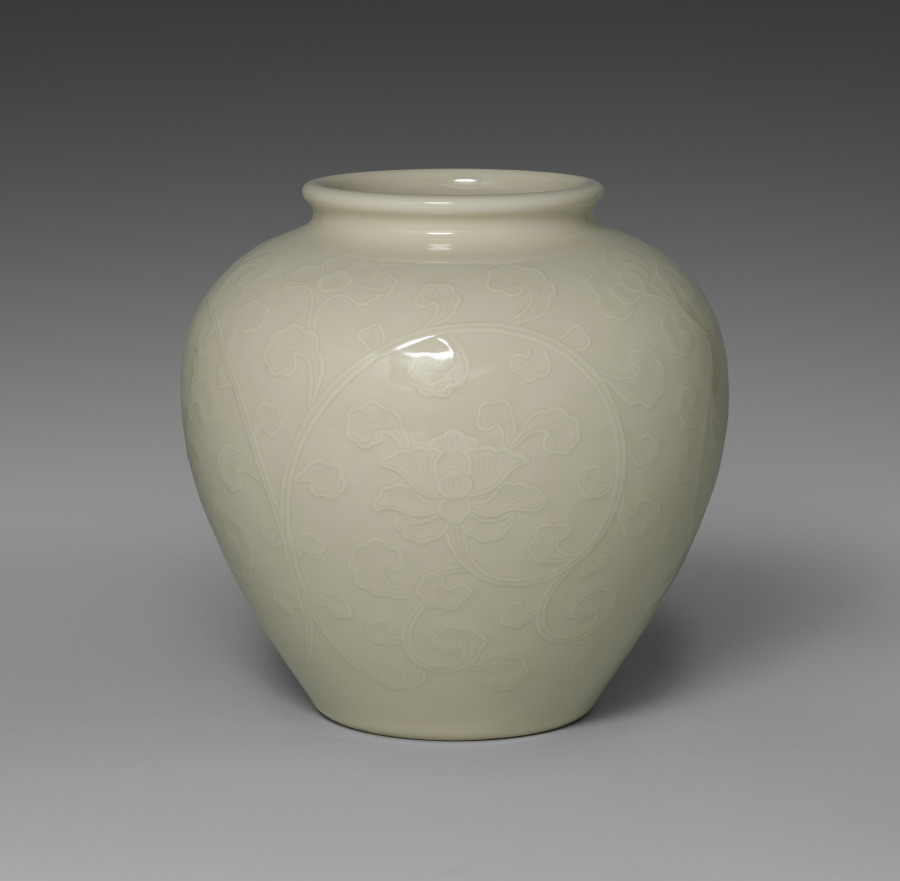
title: Guan-Shaped Vessel with Floral Scroll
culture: Japan, Taishō period (1912–26) or Shōwa period (1926–89)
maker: Seifū Yohei IV (Japanese, 1872–1951)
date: 1914–46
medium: Porcelain with molded and carved design and cream glaze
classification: Ceramic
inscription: 清風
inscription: 清風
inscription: 清風造之 【印】成山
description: Many of the vases created by Yohei III and IV were made with reference to and in emulation of Chinese ceramics in both form and glazing. The Seifu studio was inspired by later Chinese copies of two other archaic vessel types, the hu (Japanese ko) and guan (Japanese kan). In simple terms, in their original contexts, the hu and guan were storage jars that also appeared in ritual contexts. This hefty guan-shaped vase by Yohei IV has a floral scrolling pattern known in Japanese as karakusa, or “Chinese grasses.” The flowers are generally identified as lotus or peony. This flower vase might alternately be categorized as having the form of what is called a shukaiko in Japan, or a large vessel for holding wine. Shukaiko were created as early as the latter part of the Kamakura period after Yuan dynasty examples.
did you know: According to the box lid, the vase is a kanpakuji, "bright-jewel white porcelain," work.